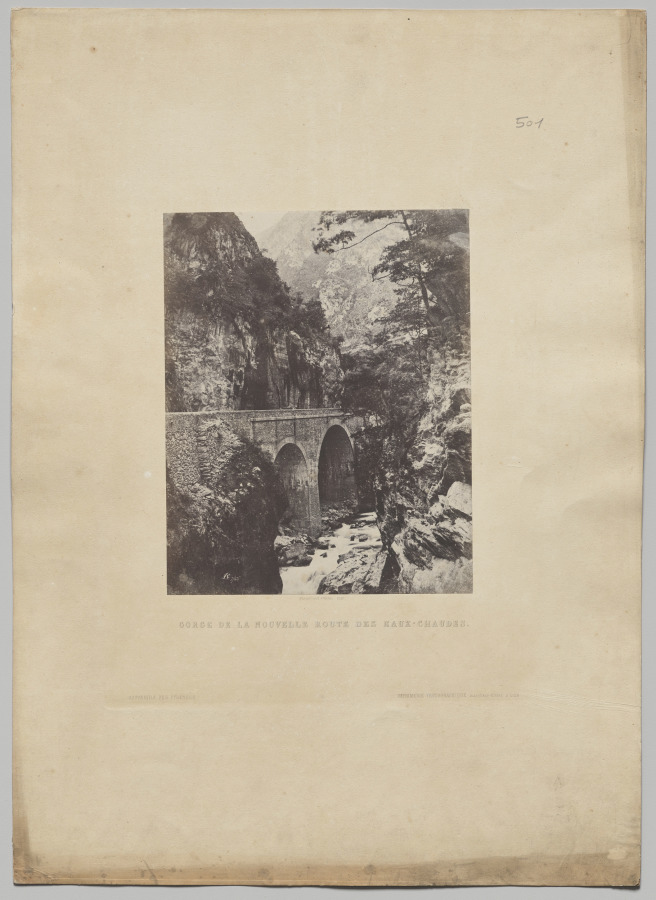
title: Gorge de la Nouvelle Route des Eaux-Chaudes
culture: England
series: Souvenirs des Pyrenées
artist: John Stewart (British, 1800–1887)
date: c. 1851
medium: salt print from a waxed paper negative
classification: Photograph